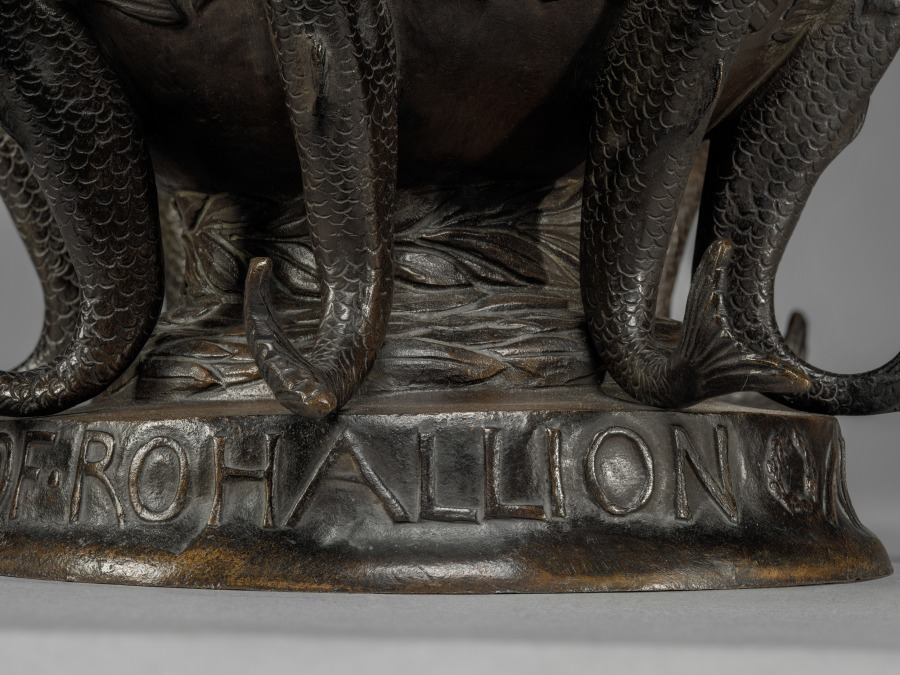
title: Pan of Rohallion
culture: America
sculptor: Frederick William MacMonnies (American, 1863–1937)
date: 1890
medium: bronze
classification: Sculpture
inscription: Signed on globe: Frederick MacMonnies, Paris 1890. © 1894. Inscribed around base: TO PAN OF ROHALLION ANNO DOMINI MDCCCLXL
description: Rohallion in the title refers to the name of an estate in New Jersey, whose owner commissioned MacMonnies to create a large fountain of this design for a garden pool. Later, the artist made several smaller versions, such as this example. Here, the ancient Greek god Pan plays his musical pipes while standing on an orb supported by fish.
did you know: The character of Peter Pan, including his flute playing, references the Greek god Pan.